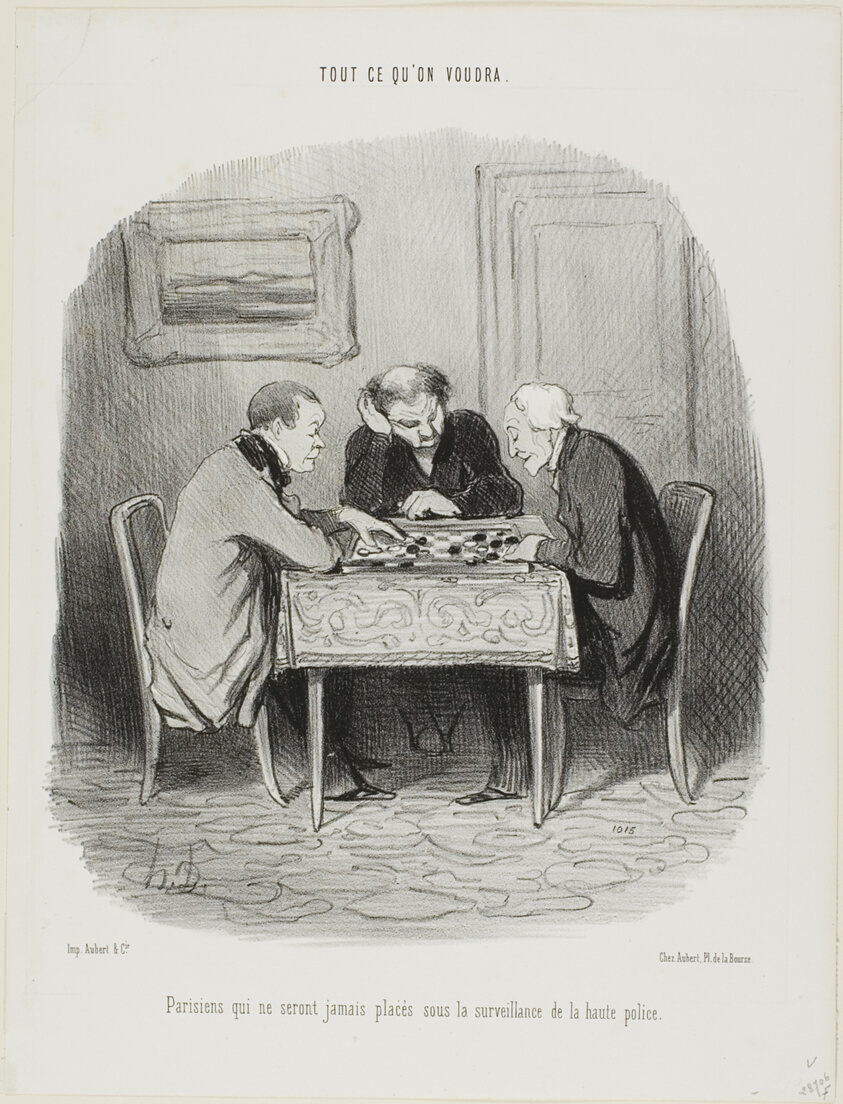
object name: Print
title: Parisians who will never be placed under surveillance of the secret police, plate 12 from Tout Ce Qu'on Voudra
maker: Honoré Victorin Daumier; French, 1808-1879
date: 1847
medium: Lithograph in black on white wove paper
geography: France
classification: lithograph; print; prints and drawing